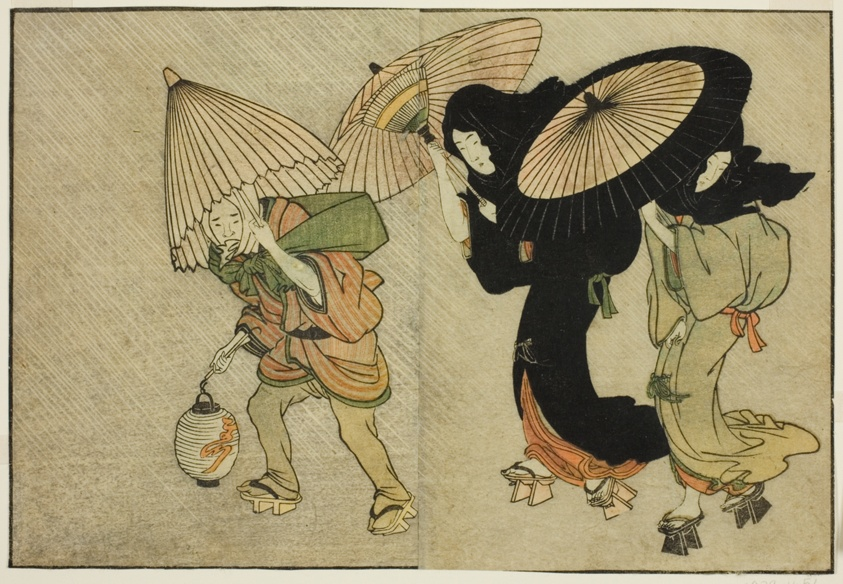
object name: Print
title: Two Women and Attendant Caught in a Storm, from the illustrated book "Picture Book: Flowers of the Four Seasons (Ehon shiki no hana)," vol. 2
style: Japanese (culture or style)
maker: Kitagawa Utamaro 喜多川 歌麿; Japanese, 1753 (?)-1806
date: New Year, 1801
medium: Color woodblock print; double-page illustration from book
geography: Japan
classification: woodblock print; print; asian art